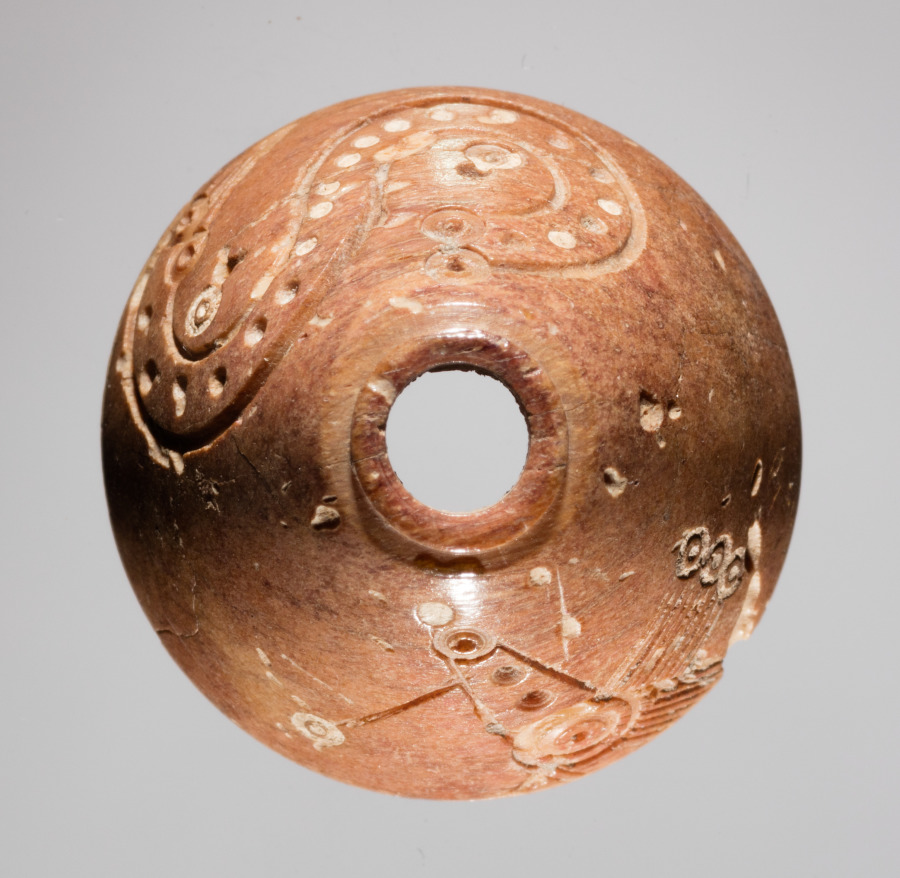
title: Spindle Whorl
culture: Iran, early Islamic period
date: 700s - 900s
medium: bone, incised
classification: Spindle Whorl